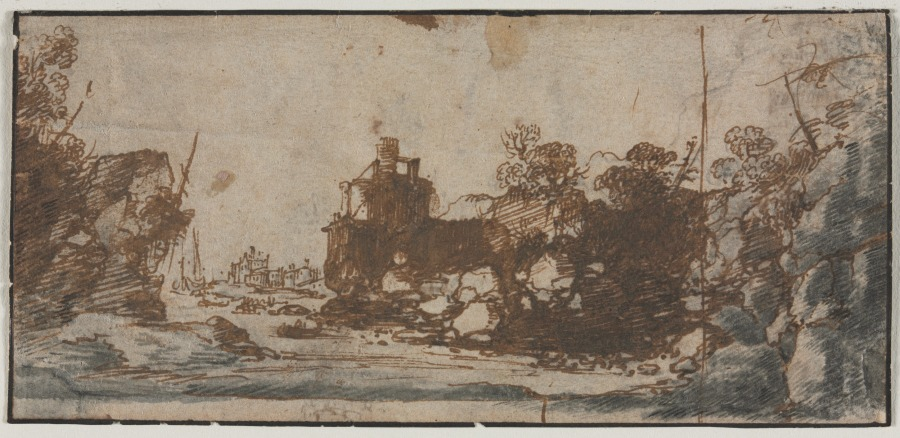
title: Rocky Inlet with Boats and Buildings (recto); Sketches of Castles (verso)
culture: Netherlands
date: 1600s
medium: pen and brown ink, point of brush and black and gray wash, and brush and gray wash over traces of graphite; framing lines in brown ink (iron gall)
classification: Drawing